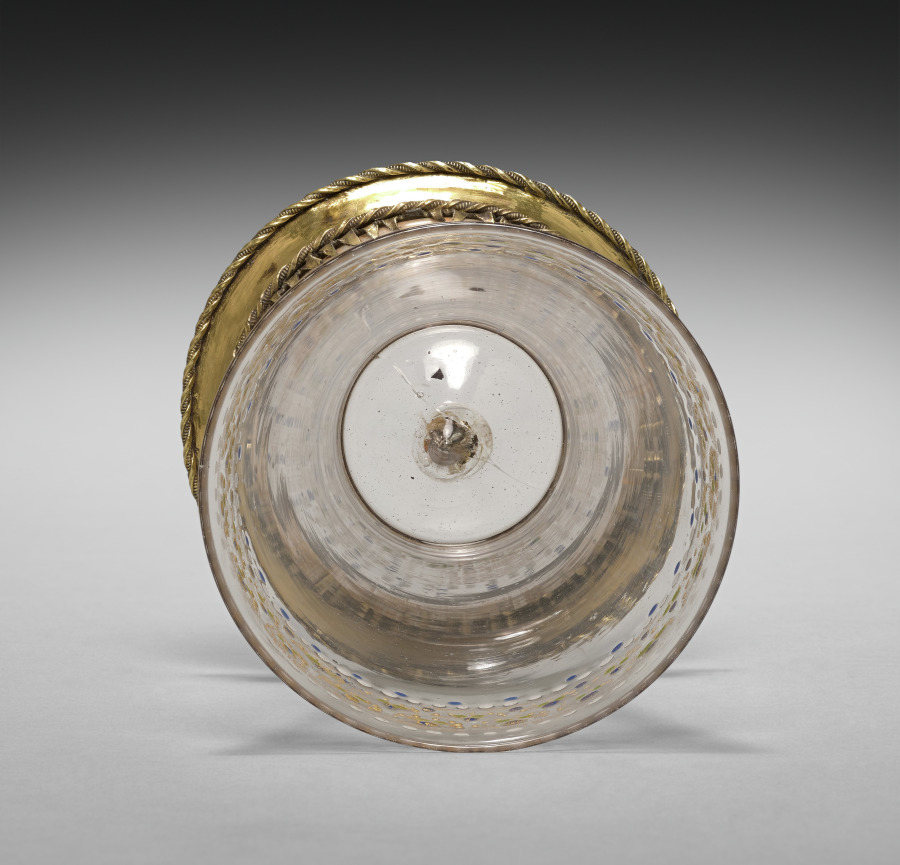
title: Beaker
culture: Italy, Venice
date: c. 1490–1500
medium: glass, enameled and gilded, gilt-silver mounts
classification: Glass